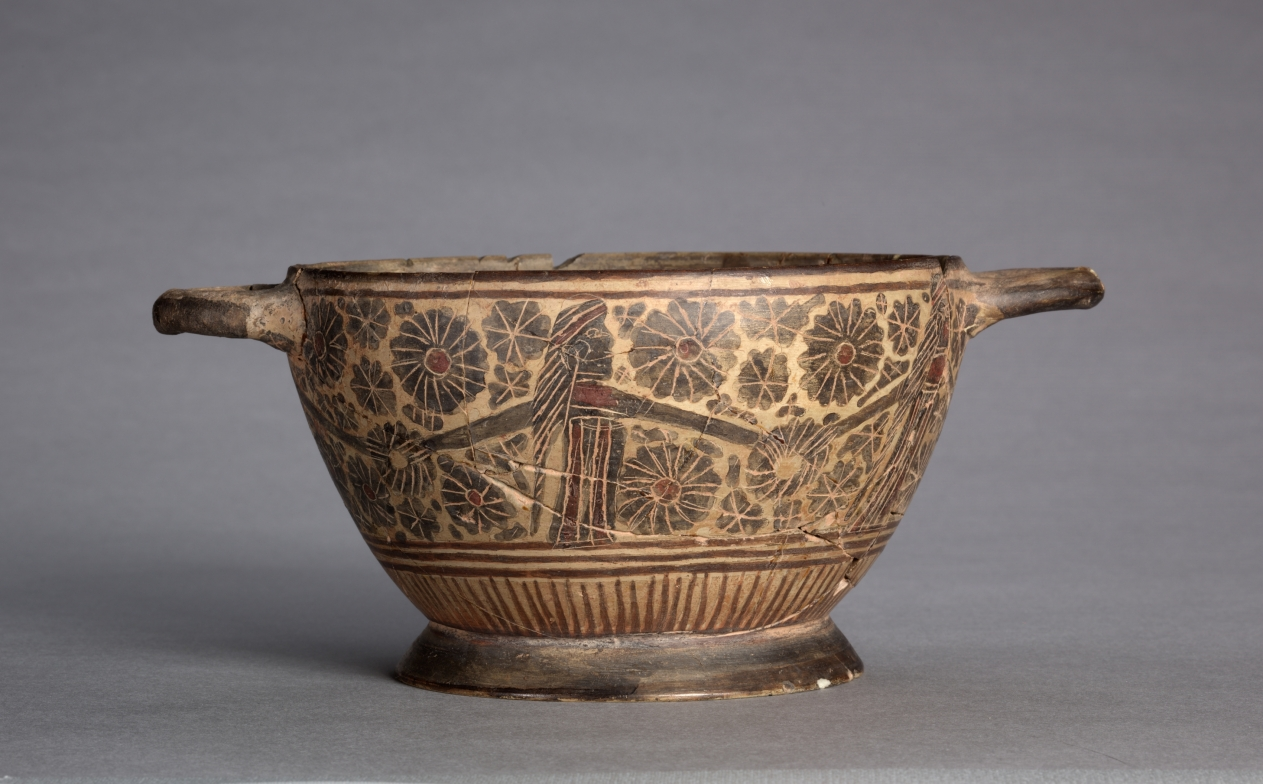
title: Black-Figure Kotyle (Drinking Cup): Chain of Women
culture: Greek, Corinthian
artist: attributed to Patras Painter (Greek, Middle Corinthian)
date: c. 590–560 BCE, with modern repainting and reincising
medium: ceramic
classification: Ceramic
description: Reassembled from 34 fragments, this cup bears ancient decoration that has been made more legible through modern repainting and re-incising, or re-scratching, of the internal details of figures and rosettes. Because they are irreversible and potentially misleading, such modern interventions are no longer seen as acceptable; when sold in 1922, the cup was described as “repaired,” albeit without additional explanation.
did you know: The Patras Painter specialized in decorating drinking cups, often with chains of women.